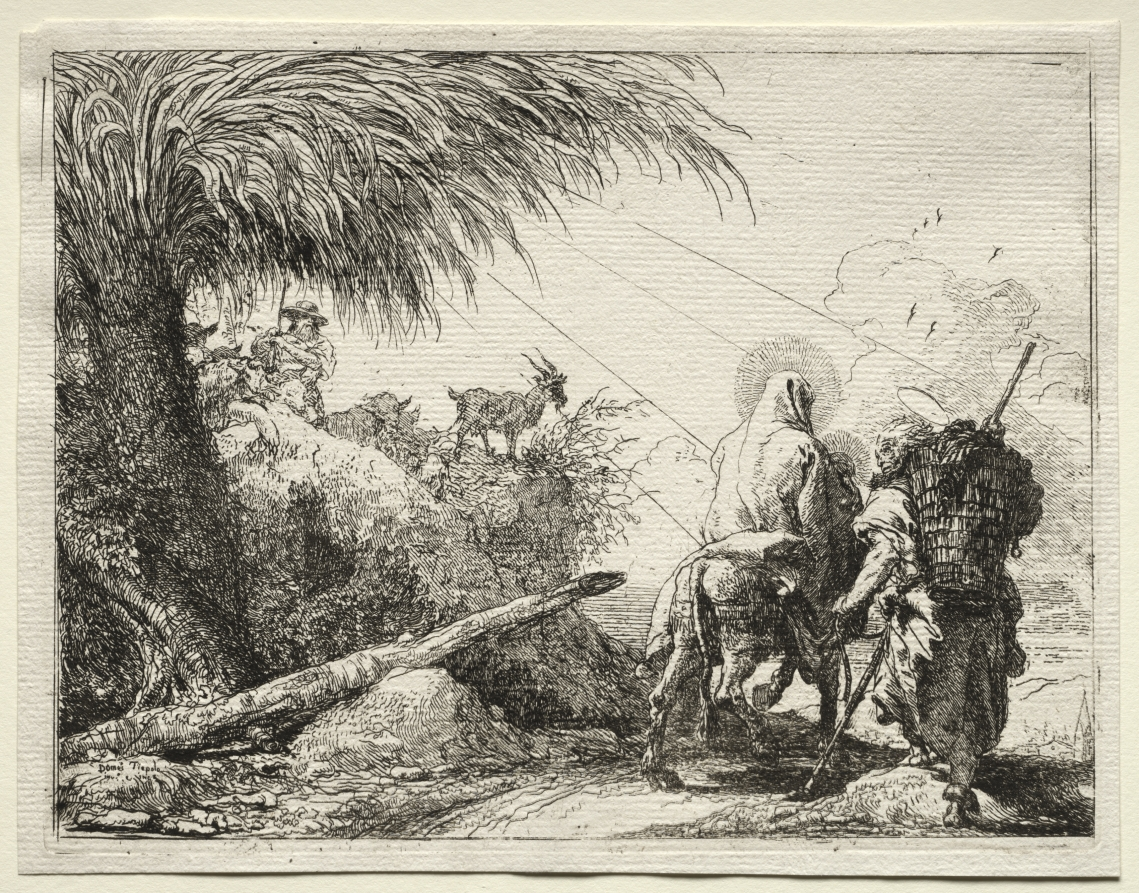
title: Flight into Egypt: The Holy Family and the Palm Tree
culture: Italy, 18th century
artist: Giovanni Domenico Tiepolo (Italian, 1727–1804)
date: 1750–53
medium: etching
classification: Print